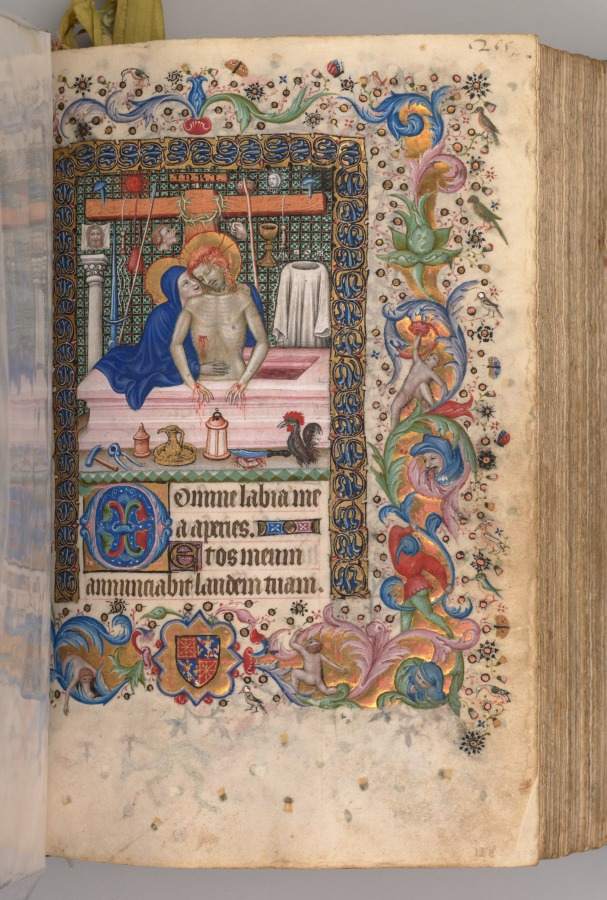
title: Hours of Charles the Noble, King of Navarre (1361-1425): fol. 128r, Man of Sorrows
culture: France, Paris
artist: Master of the Brussels Initials and Associates (French)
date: c. 1405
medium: ink, tempera, and gold on vellum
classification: Bound Volume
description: This precious volume was obviously highly prized by its owner, the French-born King of Navarre, who had his coat of arms painted on no less than twenty folios. Rather than directly commissioning this manuscript from a specific workshop, it seems that Charles the Noble acquired his book of hours -- perhaps ready-made for the luxury market -- while on a trip to Paris in 1404-05. A collaborative effort, six painting styles are evidenced within the pages of this codex, those of two Italians, two Frenchmen, and two Netherlanders. The painter who was responsible for the planning and decoration of the book, and who produced seventeen of the large miniatures, was a Bolognese artist known as the Master of the Brussels Initials. His principal assistant, responsible for most of the borders, was a Florentine who signed his name "Zecho" da Firenze on folio 208 verso.